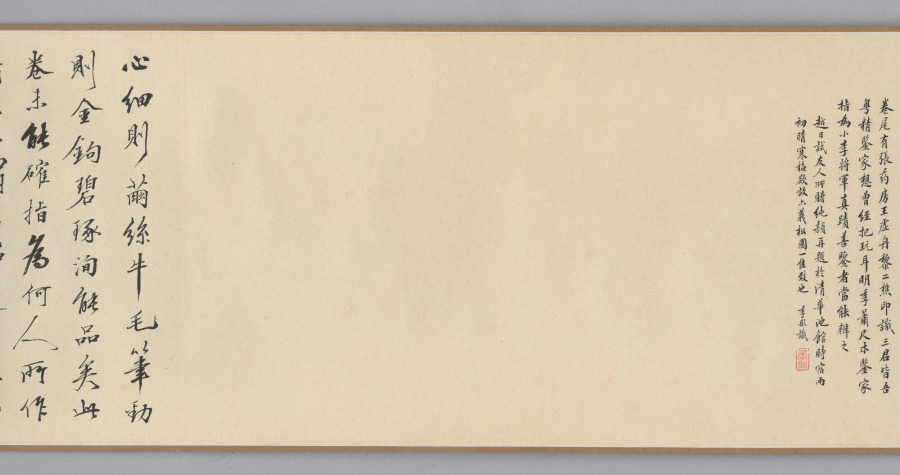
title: Waiting for the Moon in the Mid Autumn Festival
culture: China, Ming dynasty (1368–1644)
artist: Shi Rui (Chinese, c. 1400-c. 1470)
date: 1400s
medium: handscroll, ink, color, and gold on silk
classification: Painting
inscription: [印] 石氏以明; 游戯翰墨.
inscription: 僊山樓觀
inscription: 1 inscription, dated 1639, and 1 seal of Xiao Yuncong 蕭雲従 (1596-1673). Inscription by Xiao Yuncong: This is a painting by the Junior General Li. The painting is damaged and cracked at many places. Many of the paper strips for backing have been missing since long ago, but the colors are still fresh as if they had just been applied and the ink still looks moist. During the reign of Tianbao (742-756) of the Tang Dynasty, the Imperial Klansman Li Sixun was summoned to paint the walls of the Datong Hall. He was known as the "Senior General." His son, who came to be known as the "Junior General," was named Zhaodao. Of the stone epitaph [Li Sixun bei, or the "epitaph of Li Sixun," one of the best known calligraphic monuments of the Tang Dynasty], engraved with the calligraphy of Li Beihai 李北海 [Li Yong 李邕, 678-747], more than half has fallen off. Why, in contrast, was this painting able to survive? Or could it be that despite the fact that the stone is hard and the silk is soft, their preservation or destruction depends on some other factors? Moreover, since they were titled nobility of imperial descent, it is doubtful that they had the leisure and the mood to indulge in such decorative and descriptive blue and gold painting for the mere amusement of their fellow men. Recently, I read the Yi zhou ming hua lu 益州名畫錄 [by Huang Xiufu 黃休復, preface 1005]. I found a certain Li Chin-nu who compared himself with Li Zhaodao 李昭道 and was called by the Sichuan people the Junior General Li. In a painting which he did, entitled Mt. Ch'ing-ch'eng, the architectural structure of the pavilions, terraces, bridges, and boats are meticulous and accurate. The horsemen on a spring outing are as small as grain and the wild geese among the clouds as tiny as dust. It was also said that he painted on silk of any length in accordance to specific commissions. Is it possible that this painting is one of his? Since that time 700 years have passed. Yet one of the two Junior General Li's must be our painter. Formerly, there were the so-called "Four Excellents" in the Hall of Portraits of the Buddhist monk Wu-ta Kuo-shih: the [portrait] painting by Ch'ang Ts'an [act. ca. 881-888}, the calligraphy by Priest Tao-ying, the eulogy by Li Shangyin 李商隱 [813-858], and the landscape by Li Sheng [act. ca. 908-925]. This Li Sheng was styled Chin-nu and was also called Junior General Li. In the tenth month of the Chi-mao year, the twelfth year of the Chongzhen era [1639], recorded by Xiao Yuncong of Wuhu. trans. WKH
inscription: 4 colophons and 30 additional seals: 1 seal of Xu Qianxue 徐乾學 (1631-1694); 1 seal of Li Chien 黎簡 (1747-1799); 1 seal of Chang Chin-fang (18th c.); 2 seals of Sun Erzhun 孫爾準 (1770–1832); 1 colophon and 2 seals of Zhang Weiping 張維屛 (1780-1859); 1 seal of Wu Rongguang 吳榮光 (1773-1843); 1 colophon and 2 seals of Luo Tianchi 羅天池 (1826 jinshi); 7 seals of Wu Yanhui 伍元蕙 (active 1821–1851); 2 colophons and 4 seals of Pan Zhengwei 潘正煒 (1791-1850); 9 seals unidentified.